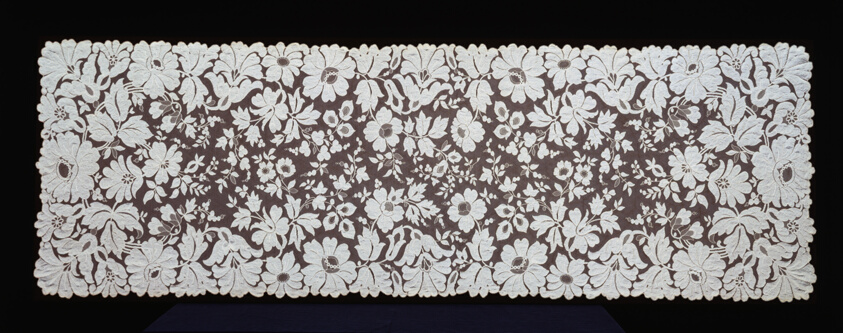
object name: Costume and Accessories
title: Shawl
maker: Probably France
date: 1860s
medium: Silk, Pusher machine lace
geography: France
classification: textile; lace - machine; lace; costume